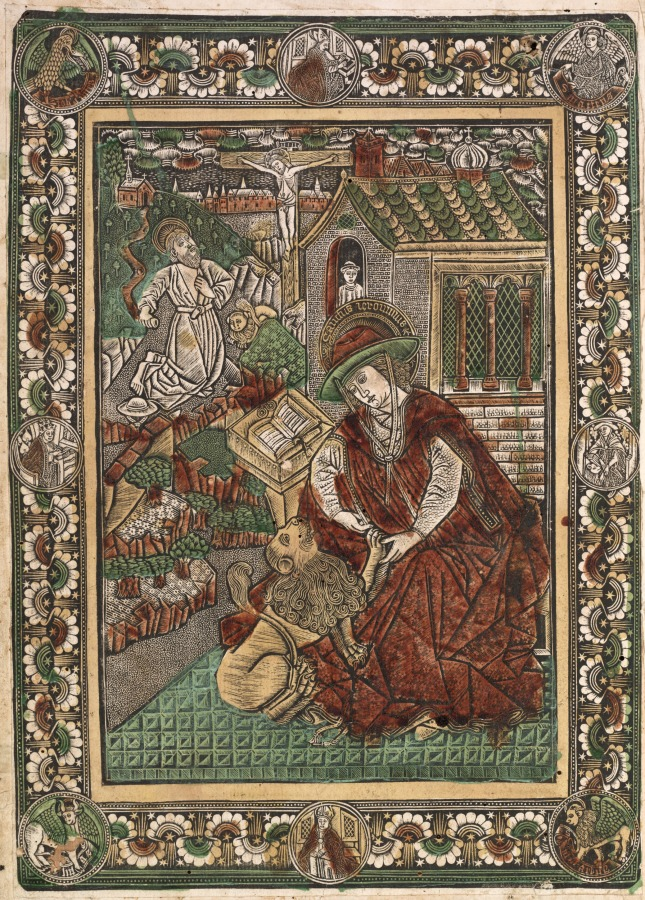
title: St. Jerome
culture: Germany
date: 1460–1470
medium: engraving, hand-colored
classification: Print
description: Produced in the second half of the 15th century in Germany and France, metal cuts created a distinctive decorative effect. The craftsman first engraved the plate with the outline of the subject. Then large, plain surface areas, which would print as an unrelieved black, were broken up using punches and stamps. There are only three impressions known of Saint Jerome, but this one is perhaps the most fascinating because it remains attached to the binding of William Durandus’s Rationale divinorum offciorum, into which it was glued near the end of the 1400s. Published in Basel before 1477, the book was the most authoritative medieval compendium of church and liturgical practice.